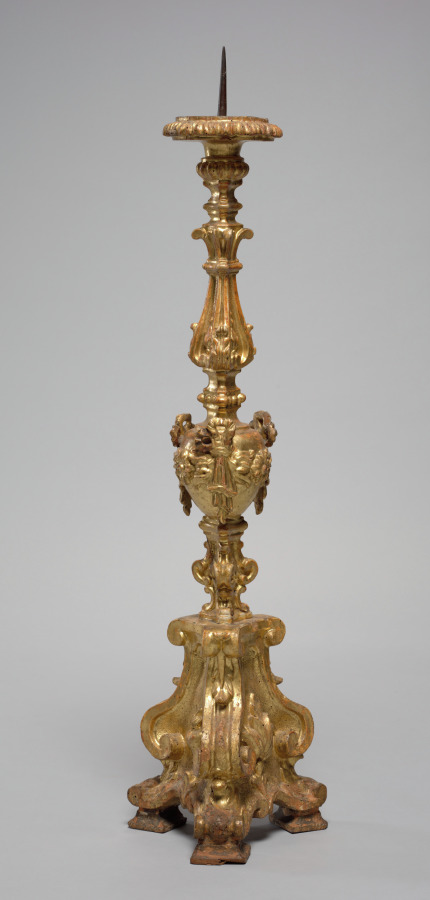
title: Candleholder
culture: Italy, mid-late 17th century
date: mid-late 1600s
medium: gilded wood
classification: Furniture and woodwork